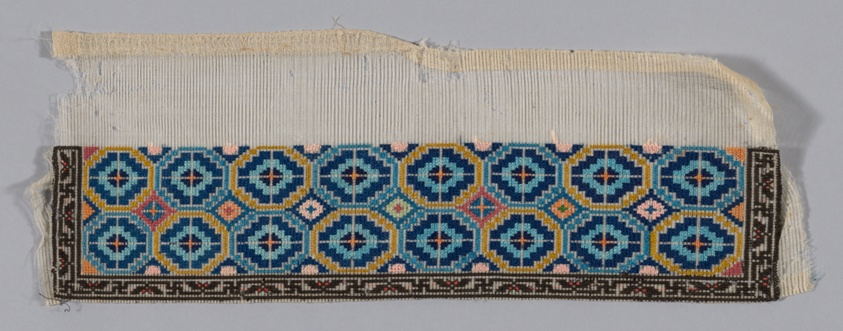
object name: Costume and Accessories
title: Band (from Woman's Trousers or Robe)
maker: China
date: 1875/1900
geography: China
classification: costume - needlework; needlework (visual works); costume